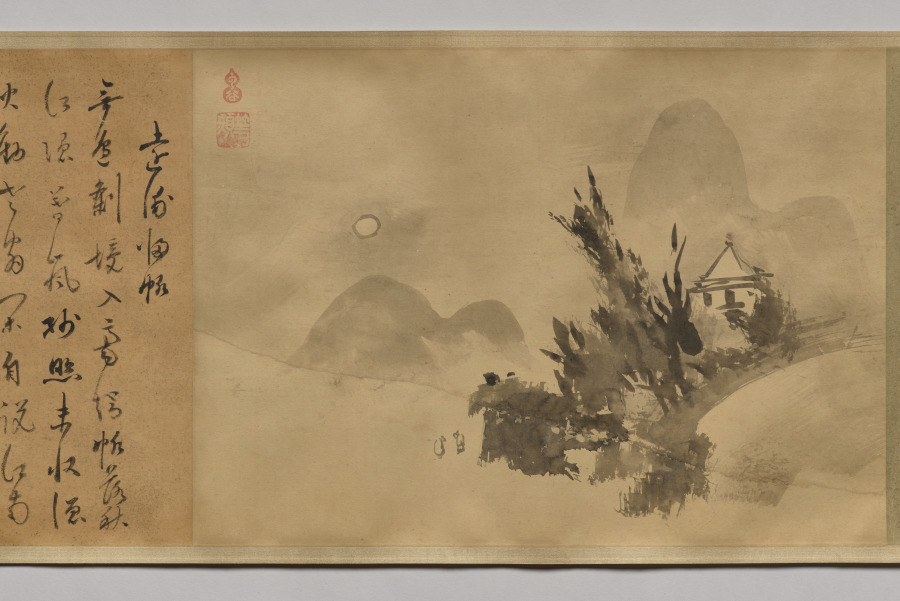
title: Poems and Pictures of the Eight Views of Xiao-Xiang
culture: Japan, Momoyama period (1573–1615)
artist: Unkoku Tōgan (Japanese, 1547–1618)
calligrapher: Inkei Gentetsu (Japanese, 1562–1612)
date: 1605–12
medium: Handscroll; ink on paper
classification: Painting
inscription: Each painting sealed with red gourd-shaped seal reading Unkoku (雲谷) and a square seal reading Tōgan (等顔).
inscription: Each painting prefaced with a titled poem on the Eight Views of Xiao-Xiang by Yujian Ruofen (active late 13th century) inscribed by Japanese Buddhist monk Inkei Gentetsu (1562–1612).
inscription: 右寫玉㵎之筆勢／雪舟末葉等顔筆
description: Unkoku Tōgan brushed these scenes using the splashed-ink technique associated in Japan with the Chinese monk Yujian Ruofen (active late 1200s). Xiao-Xiang refers to the region in present-day Hunan province, where the Xiang River and its tributaries converge. Each of the eight views evokes a time of day or season. The earliest surviving series of Xiao-Xiang paintings is by Wang Hong (active mid-1100s), but textual evidence tells us the theme appears earlier. It was later adopted in Japan and Korea, as seen here. The poems were inscribed by Inkei Gentetsu, the third abbot of the Rinzai Zen temple Tōshunji, Japan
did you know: The “Tō” of Tōgan comes from the name of painter Sesshū Tōyō (1420–1506).